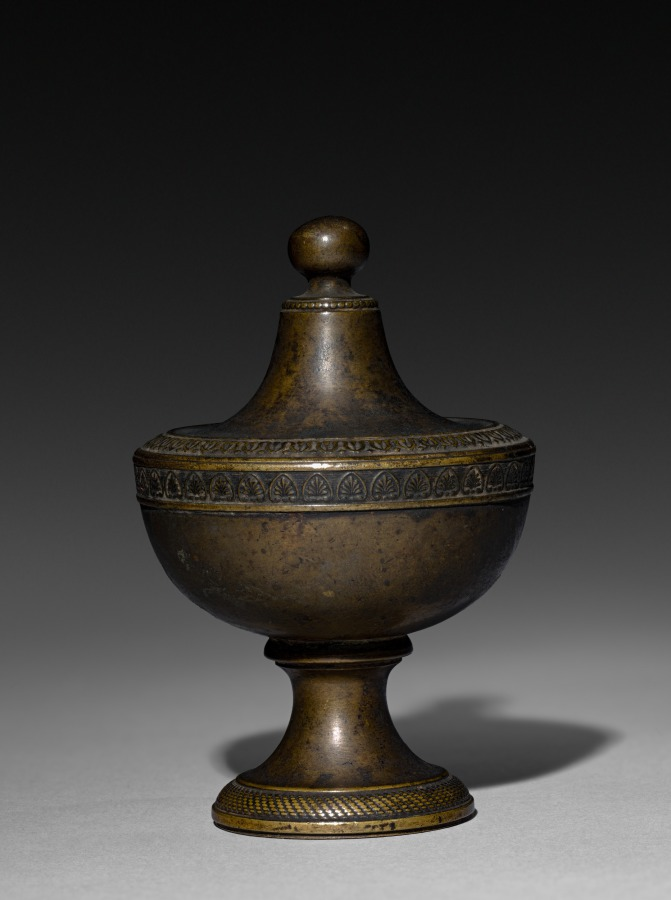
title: Ornamental Finial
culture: France, early 19th century, Empire Style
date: early 1800s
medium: bronze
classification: Metalwork